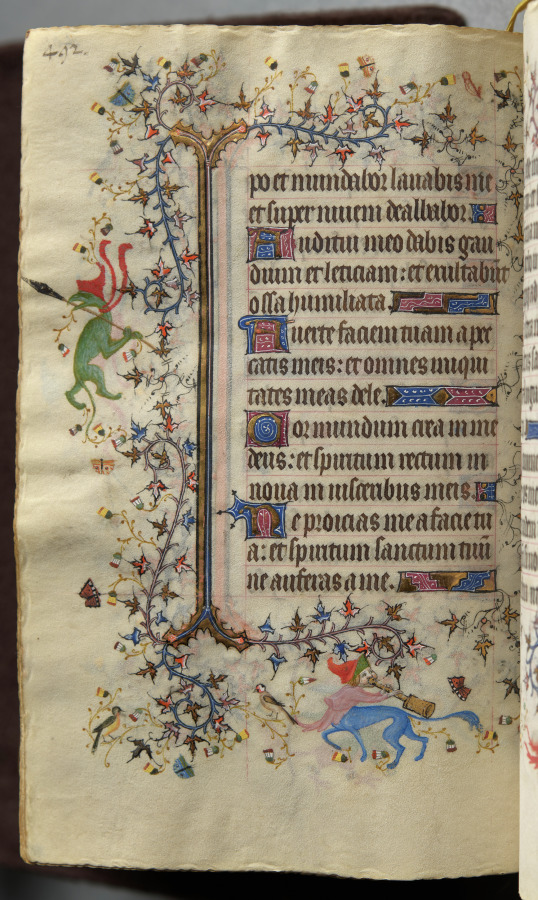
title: Hours of Charles the Noble, King of Navarre (1361-1425): fol. 240v, Text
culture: France, Paris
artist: Master of the Brussels Initials and Associates (French)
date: c. 1405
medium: ink, tempera, and gold on vellum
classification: Bound Volume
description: This precious volume was obviously highly prized by its owner, the French-born King of Navarre, who had his coat of arms painted on no less than twenty folios. Rather than directly commissioning this manuscript from a specific workshop, it seems that Charles the Noble acquired his book of hours -- perhaps ready-made for the luxury market -- while on a trip to Paris in 1404-05. A collaborative effort, six painting styles are evidenced within the pages of this codex, those of two Italians, two Frenchmen, and two Netherlanders. The painter who was responsible for the planning and decoration of the book, and who produced seventeen of the large miniatures, was a Bolognese artist known as the Master of the Brussels Initials. His principal assistant, responsible for most of the borders, was a Florentine who signed his name "Zecho" da Firenze on folio 208 verso.